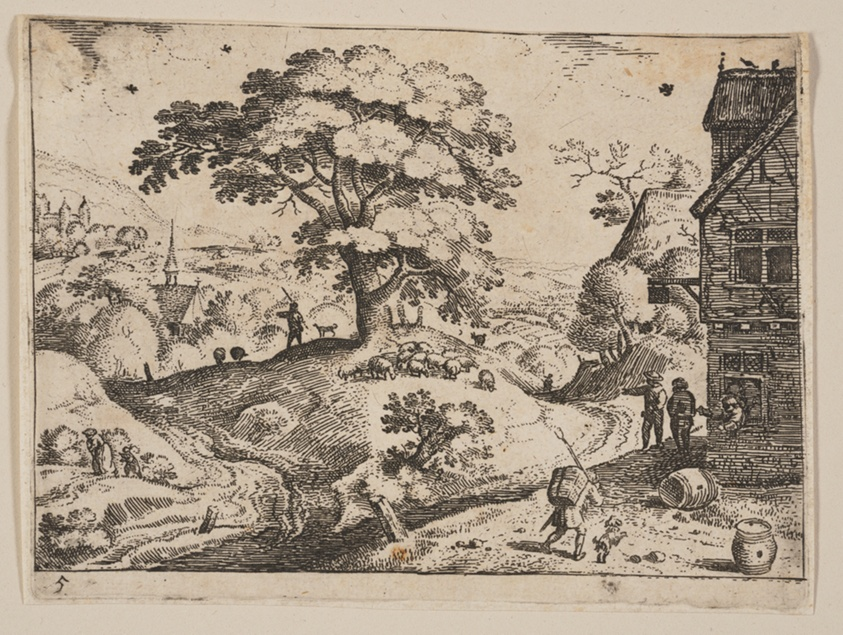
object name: Print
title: Inn to Right of Road before Village, from Landscapes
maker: Jacob Savery; Flemish, 1566–1603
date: c. 1595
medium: Etching on ivory laid paper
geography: Flanders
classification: etching; paper; print; prints and drawing